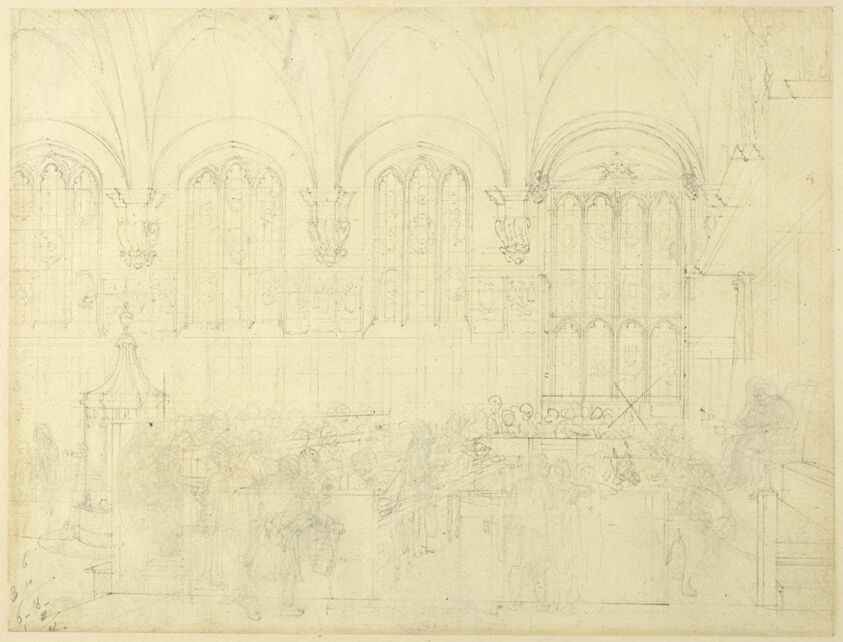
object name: Drawing and Watercolor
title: Study for Court Chancery, Lincoln's Inn Hall, from Microcosm of London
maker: Augustus Charles Pugin (English, born France, 1762-1832); Thomas Rowlandson (English, 1756-1827)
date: c. 1808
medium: Graphite on cream wove paper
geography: England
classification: graphite; drawings (visual works); prints and drawing